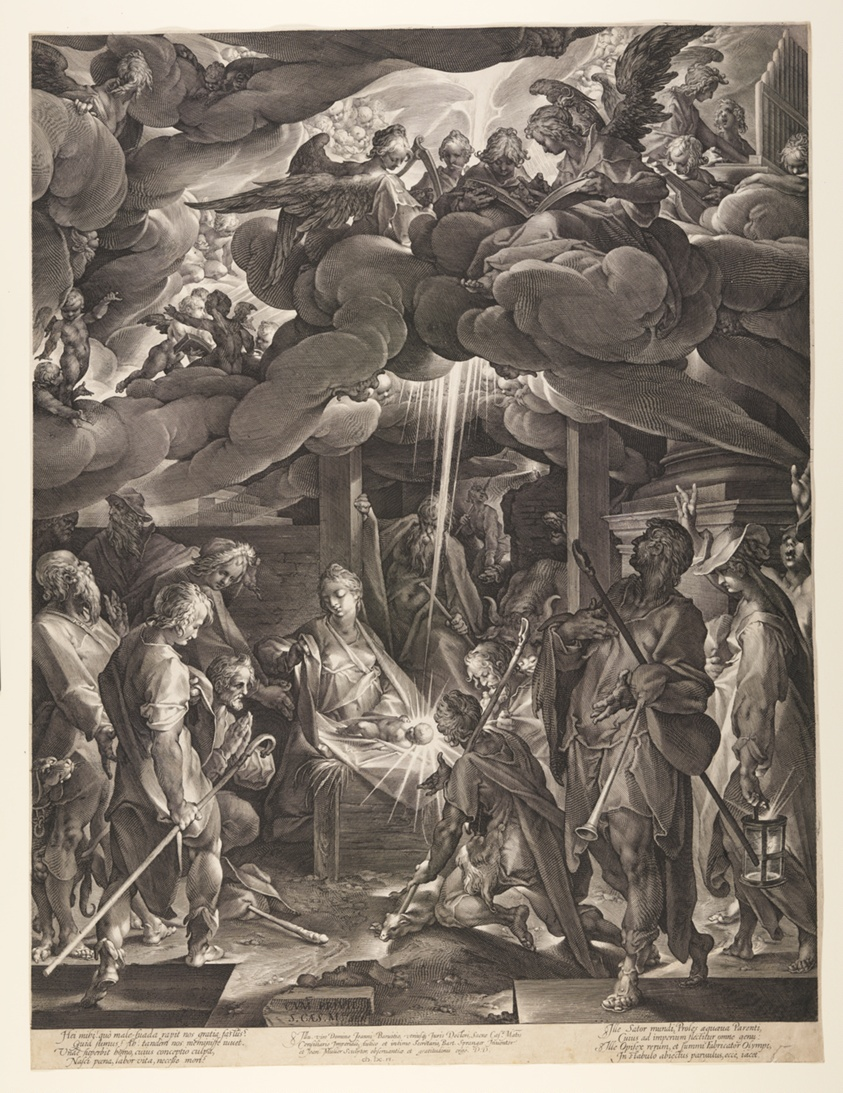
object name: Print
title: Adoration of the Shepherds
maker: Jan Harmensz Muller (Dutch, 1571–1628); Bartholomeus Spranger (Flemish, 1546–1611)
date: 1606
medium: Engraving on ivory laid paper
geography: Netherlands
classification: engraving; paper; print; prints and drawing